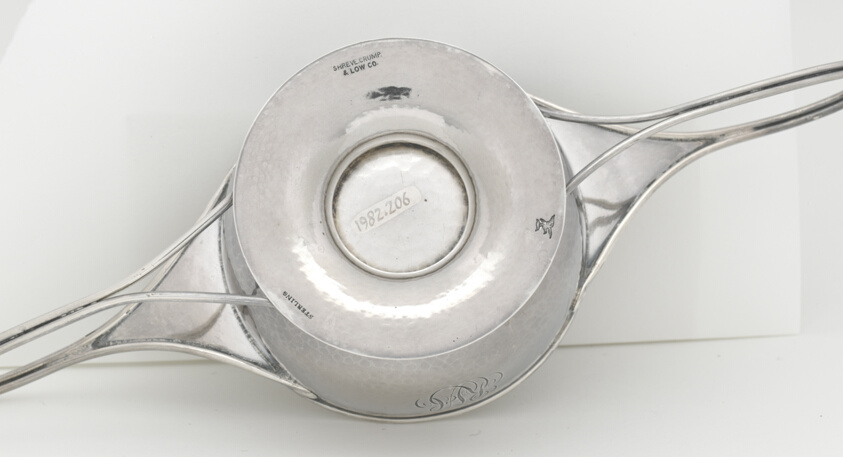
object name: Metalwork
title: Two-Handled Dish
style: Arts and Crafts Movement, American Arts and Crafts Movement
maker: Shreve, Crump and Low (American, founded 1869); Boston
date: 1902–7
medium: Silver and turquoise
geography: Boston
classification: dish (vessel); silver; american decorative arts; american arts; decorative arts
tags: dining, drinking